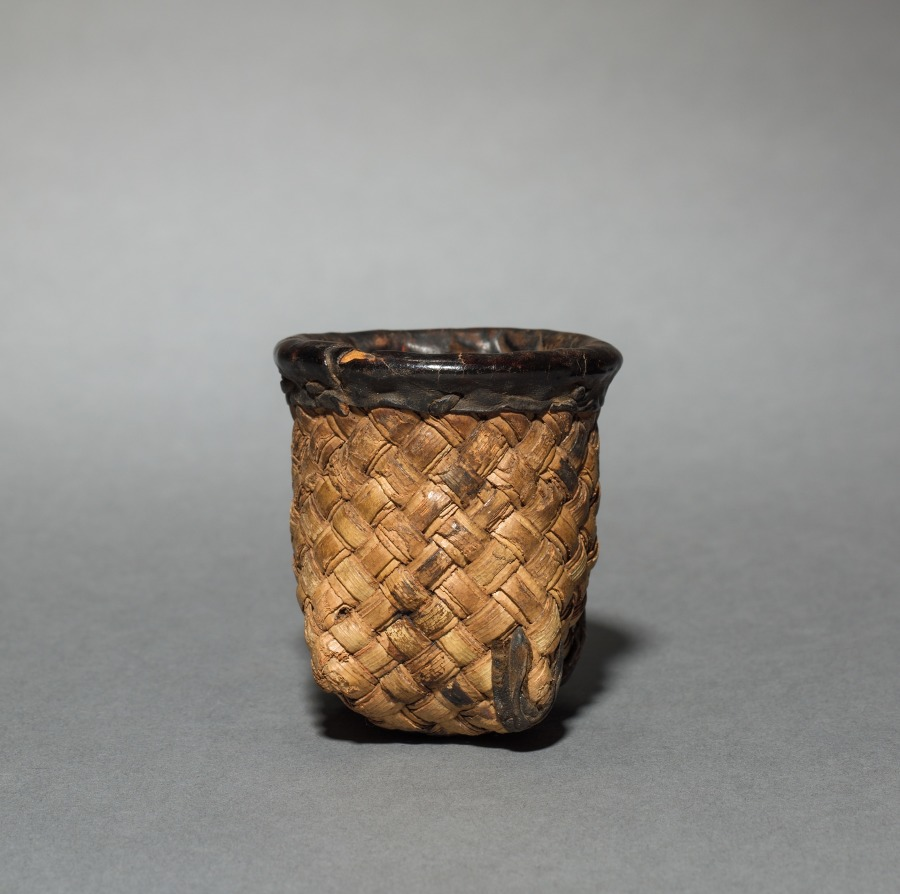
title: One of Ten Nesting Wedding Baskets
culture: Africa, Western Africa, Burkina Faso, Lobi–style maker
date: c 1900s?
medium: Plant fiber and leather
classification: Vessels